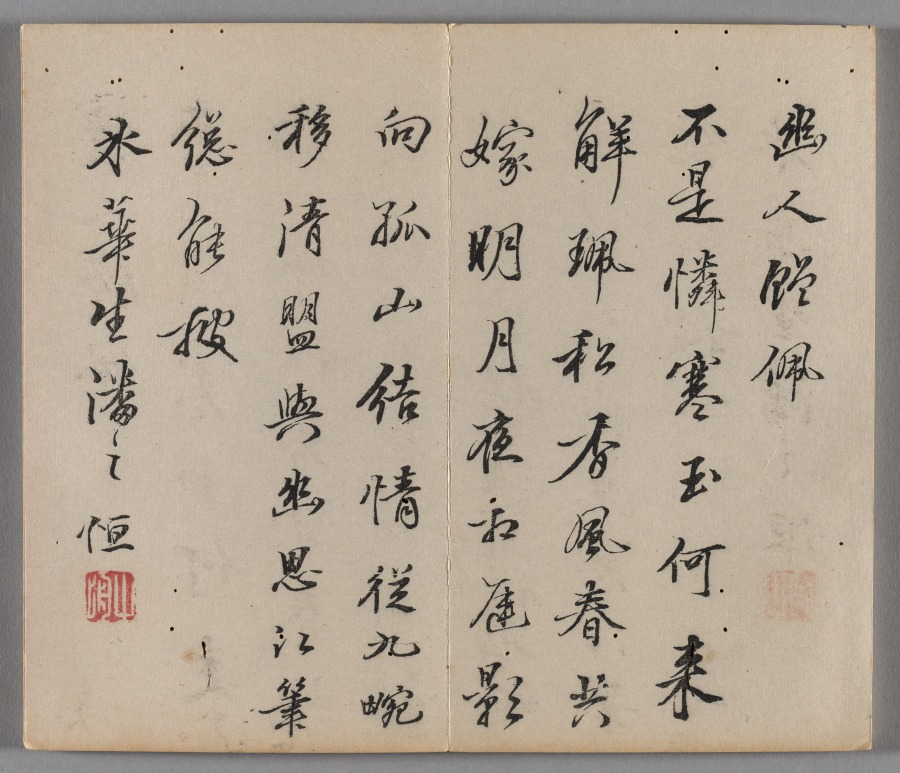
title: Ten Bamboo Studio Painting and Calligraphy Handbook (Shizhuzhai shuhua pu): Plum Blossoms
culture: China, Qing dynasty (1644-1911)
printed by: Hu Zhengyan (Chinese, c. 1584–1674)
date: 1633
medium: Woodblock-printed book; ink and colors on paper; first edition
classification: Print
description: Color printing reached a level of perfection in the early 1600s, as seen in this Ten Bamboo Studio Collection of Calligraphy and Painting and the Mustard Seed Garden Manual of Painting (printed 1679 and 1701). The painterly quality, precision in registering (aligning) the woodblocks, and harmonious colors made them the most successful color print editions in Chinese history. Both editions were printed and compiled in Nanjing, spread nationwide, and had a great impact on the arts in Japan and Korea.